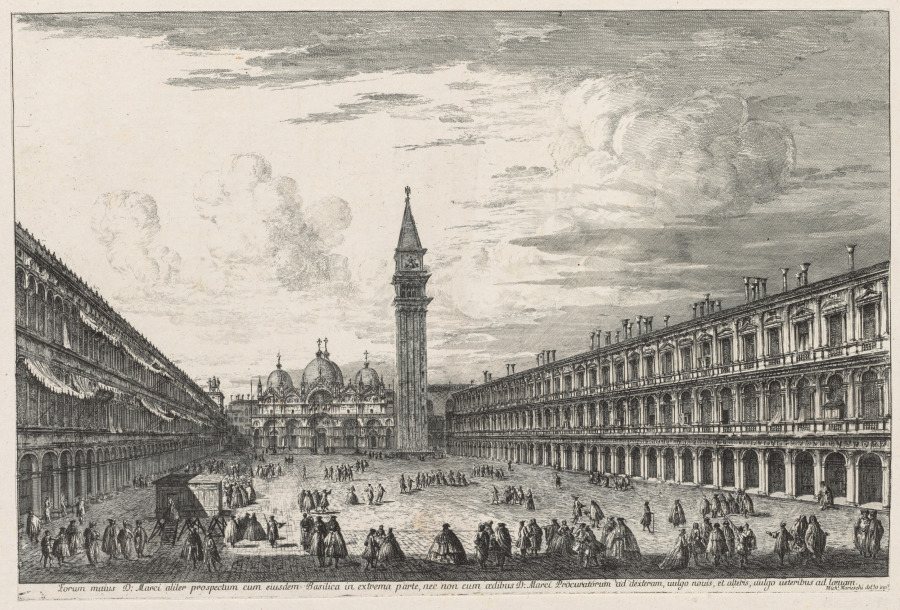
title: Views of Venice: Piazzo S. Marco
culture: Italy, 18th century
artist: Michele Marieschi (Italian, 1710–1743)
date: 1741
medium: etching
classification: Print